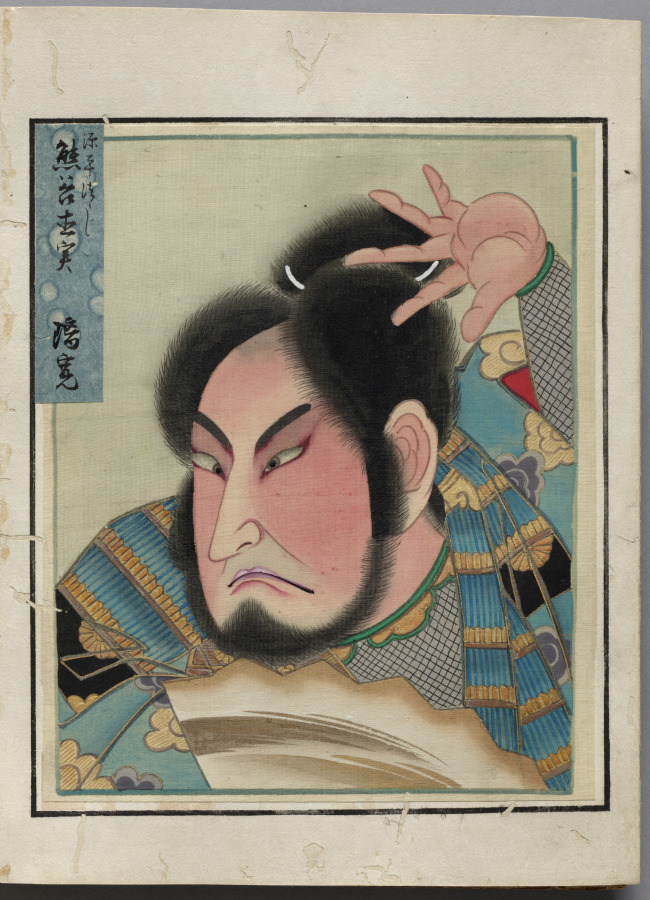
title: Double-Leaf from Album of Actor Portraits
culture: Japan, Edo period (1615–1868)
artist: Shōrakusai (Japanese)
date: c. 1790–1810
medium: double-leaf from an accordion-style album; ink and color on silk (right) and ink on paper (left)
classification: Bound Volume